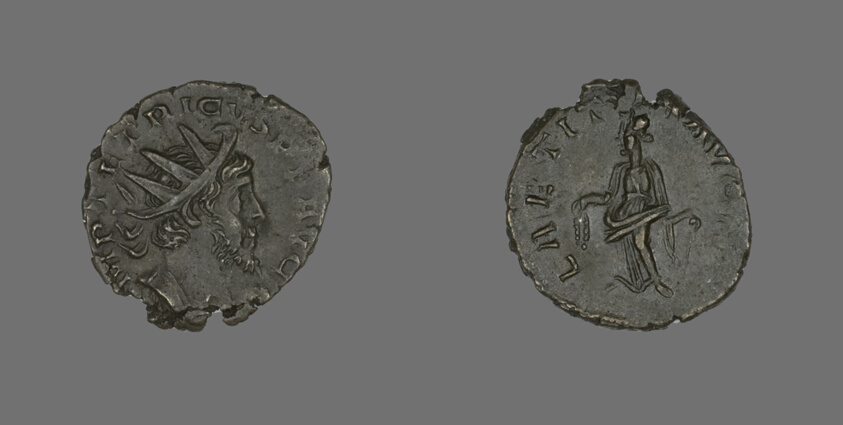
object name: Coin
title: Antoninianus (Coin) Portraying Emperor Tetricus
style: roman (ancient, style or period), ancient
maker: Roman; minted in Gaul (now France)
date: 271-274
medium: Billon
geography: Roman Empire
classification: coin; ancient art